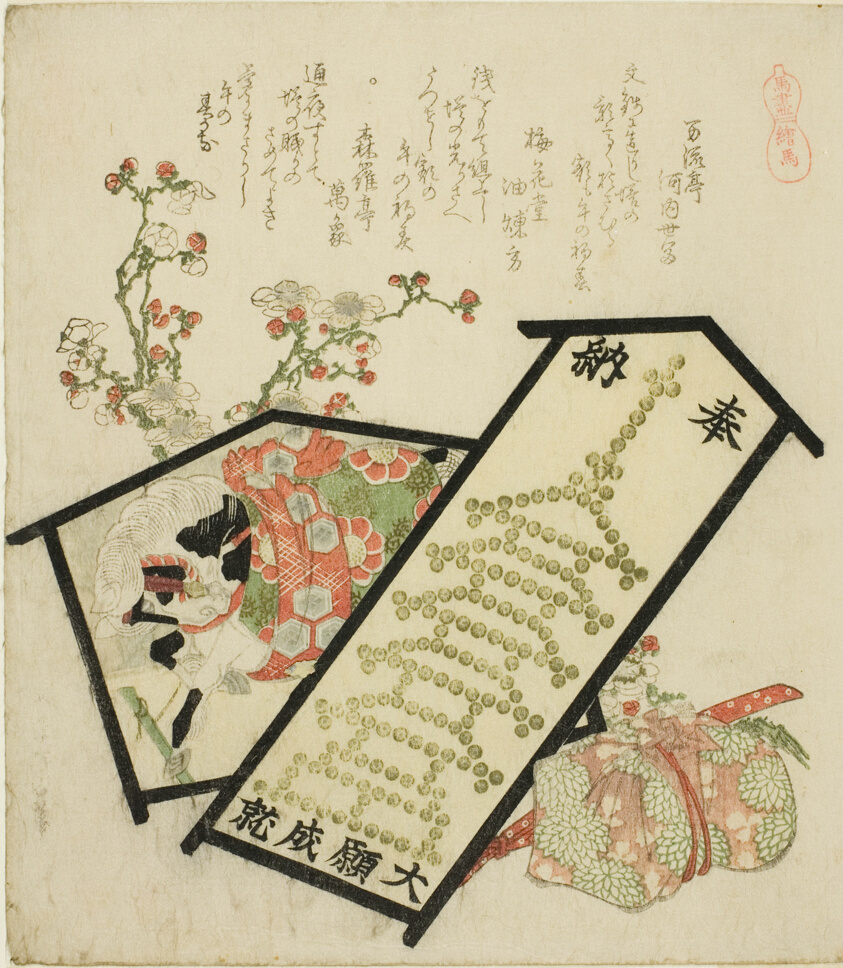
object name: Print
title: Votive Pictures (Ema), from the series "A Selection of Horses (Uma-zukushi)"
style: Japanese (culture or style)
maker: Katsushika Hokusai 葛飾 北斎; Japanese, 1760-1849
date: 1822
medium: Color woodblock print; shikishiban, surimono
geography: Japan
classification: print; asian art